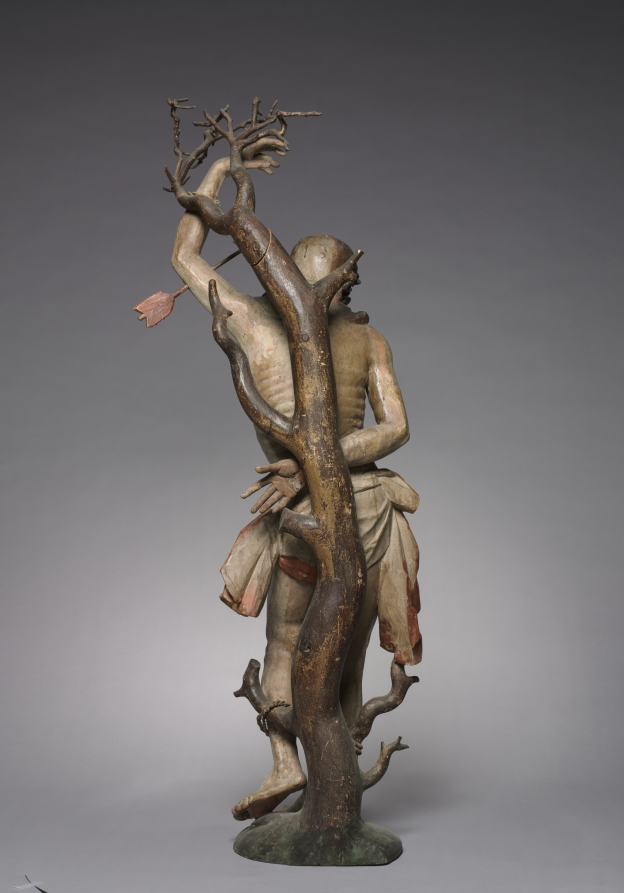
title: Saint Sebastian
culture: Germany, early 17th century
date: c. 1600–1620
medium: painted and gilded wood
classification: Sculpture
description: An early Christian saint and martyr, Sebastian was condemned to death by the Roman emperor Diocletian. Bound to a tree and shot with arrows, he survived—only later to be martyred by beating. This figure embodies the blend of stylistic influences that characterized German sculpture in the early 1600s. The graceful pose and anatomical naturalism of the legs indicate the influence of Italian Mannerism, while the crisp, stylized patterns of Sebastian’s hair and loincloth recall German Gothic works from the 1400s. The tree to which Sebastian is bound is an actual branch, shaped and refined to its present appearance.